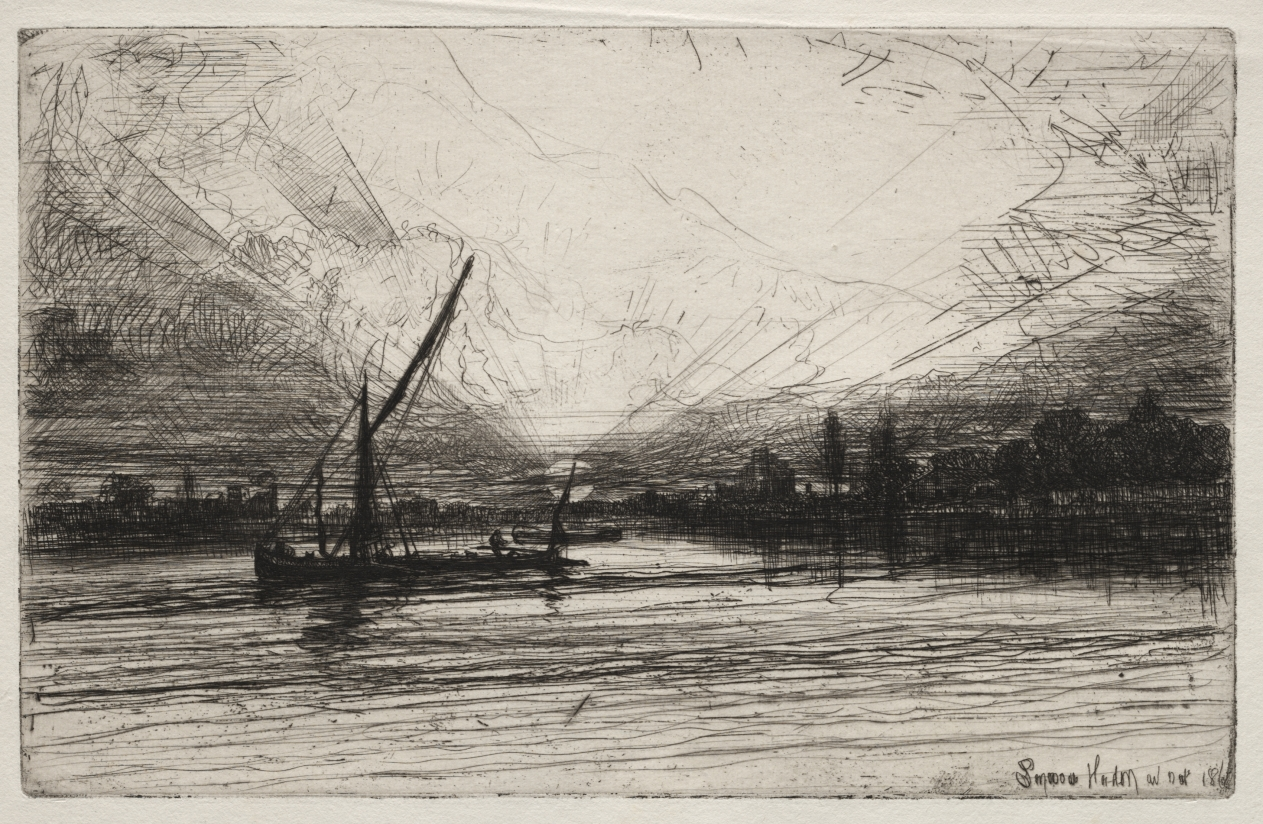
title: Sunset on the Thames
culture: England, 19th century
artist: Francis Seymour Haden (British, 1818–1910)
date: 1862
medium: etching and drypoint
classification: Print